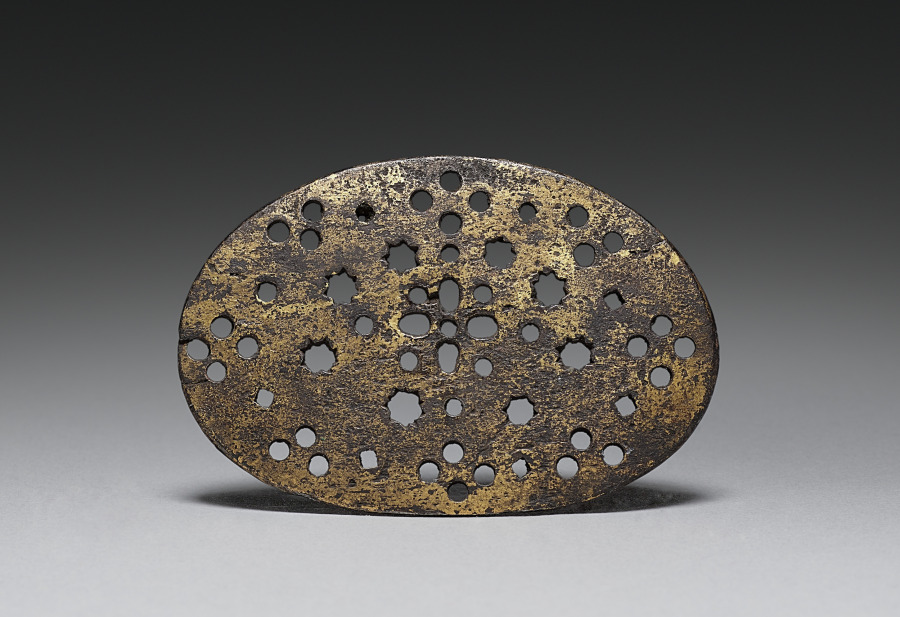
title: Metal Disk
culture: India (?)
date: before 1916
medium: Gilded metal pierced with a pattern of stars and circles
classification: Metalwork